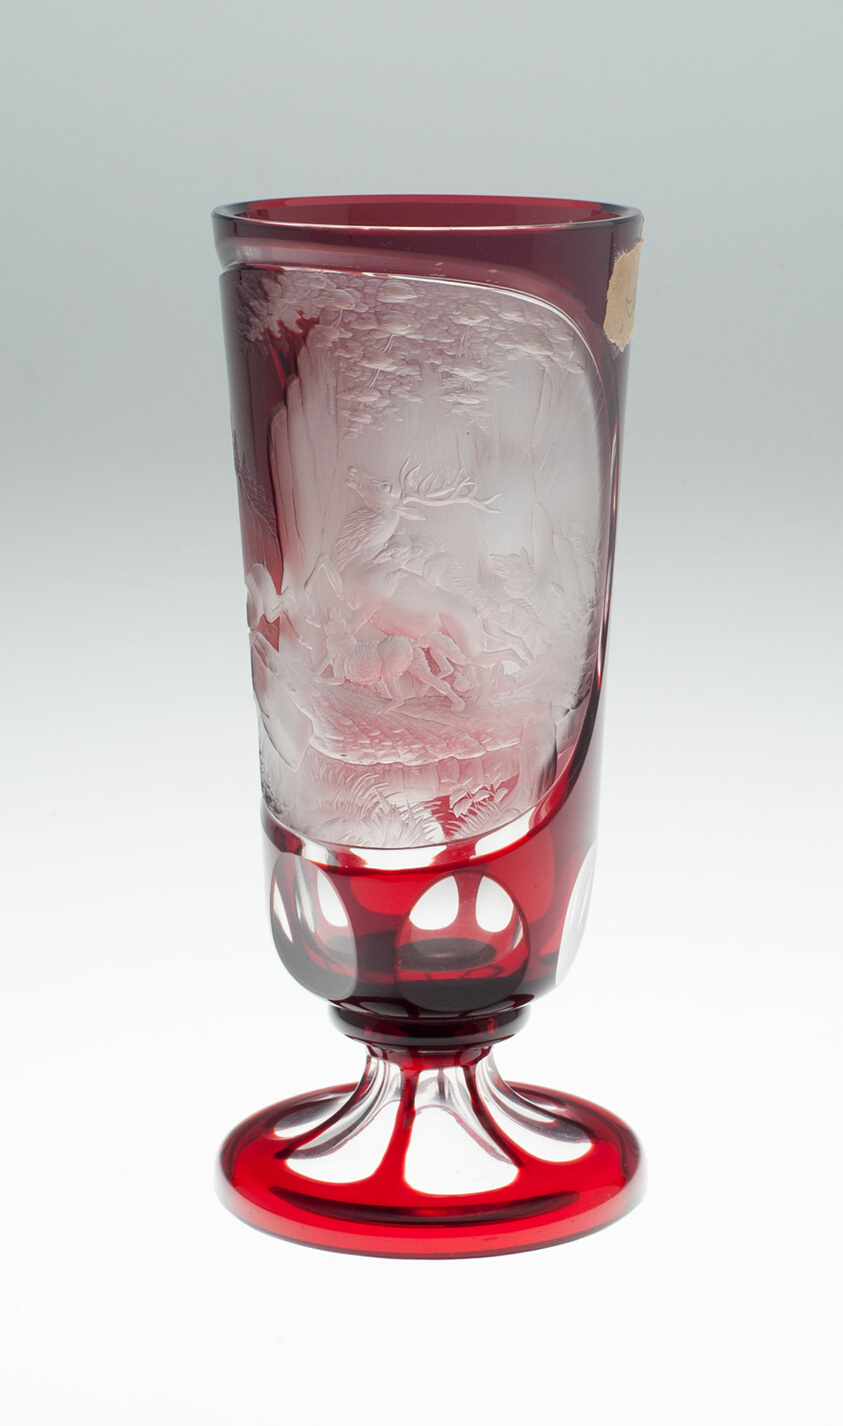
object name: Glass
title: Tall Beaker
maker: Bohemia, Czech Republic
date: c. 1850/75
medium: Glass; blown, cut, stained red and engraved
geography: Bohemia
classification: drinking vessel; glass; european decorative arts